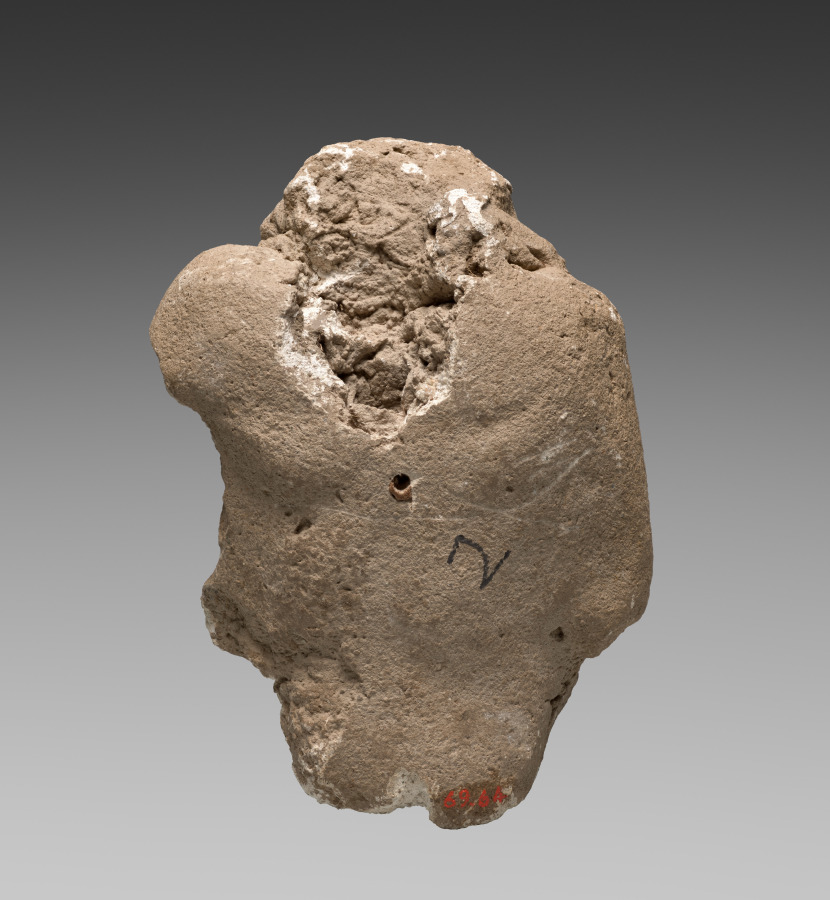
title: Male Atlantean figure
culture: Afghanistan, Hadda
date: c. 300 CE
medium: stucco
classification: Sculpture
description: The musculature, thick curly locks of hair, and deeply inset eyes of this fragmentary figure show the sculptor's incorporation of Greco-Roman forms. His hunched posture suggests that he supported a heavy weight, such as the dome of a stupa on his back. Rows of figures would have visually supported the stupa, in which relics of the Buddha or other revered Buddhist leader were interred.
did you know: Most sculptures from Hadda are preserved in museums, since the site was razed in 2001.